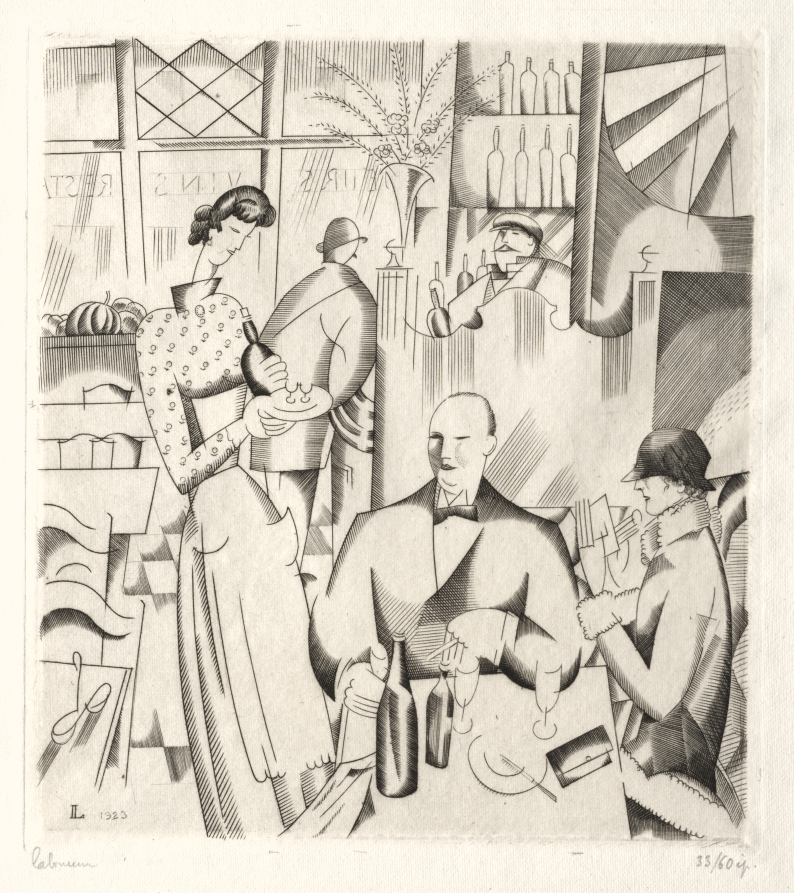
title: Dinner at the Bistro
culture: France, 20th century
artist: Jean-Émile Laboureur (French, 1877–1943)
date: 1923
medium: engraving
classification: Print